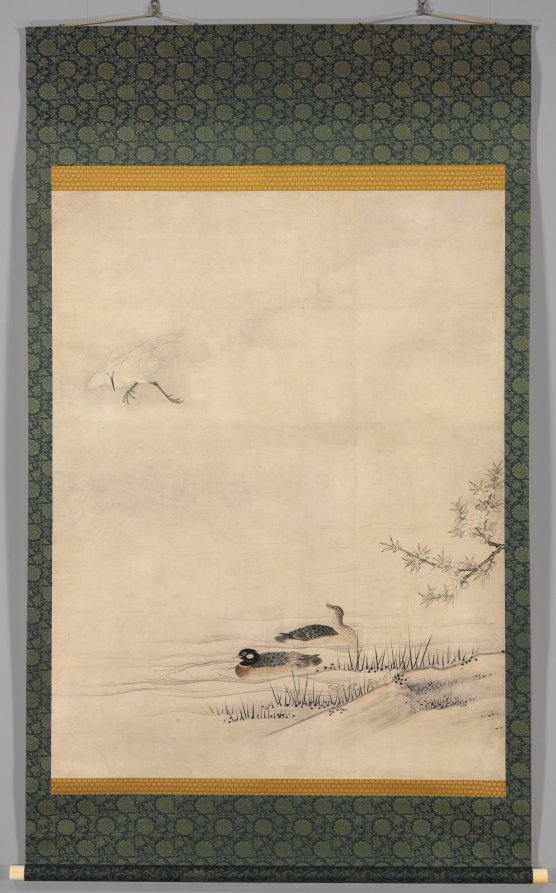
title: Flowers and Birds in a Spring Landscape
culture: Japan, Muromachi period (1392–1573)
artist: attributed to Kano Motonobu (Japanese, c. 1476–1559)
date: 1500s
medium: One of a set of sliding door panels mounted as hanging scrolls; ink and color on paper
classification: Painting